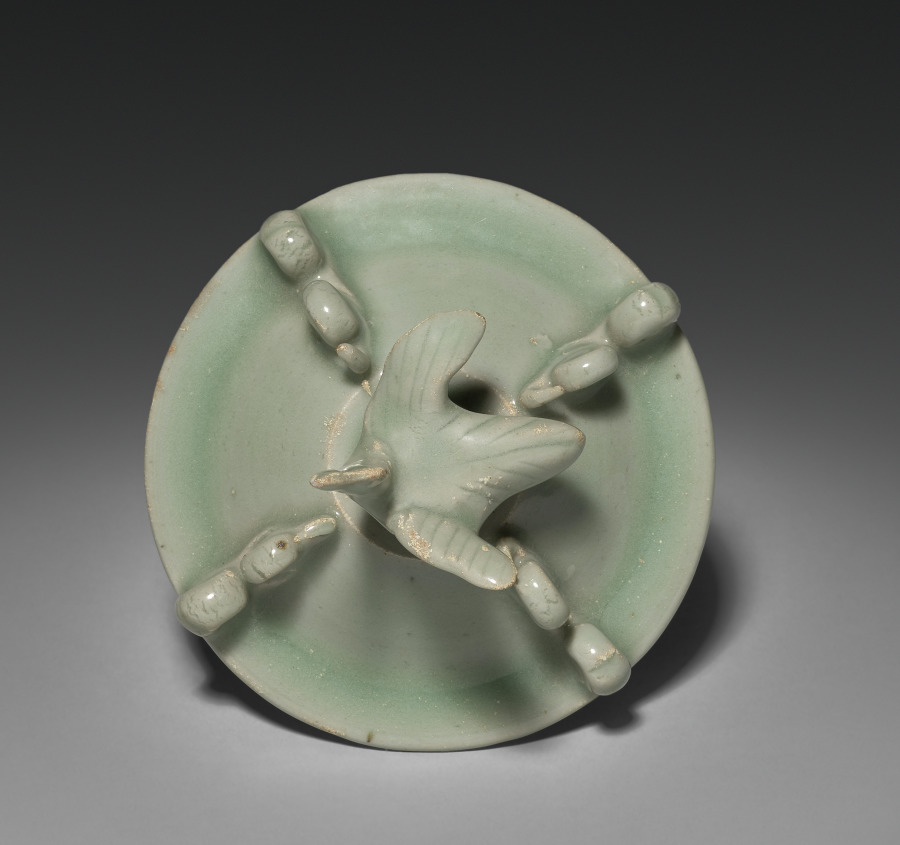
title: Five-Spouted Vase with Cover (cover)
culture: China, Zhejiang province, Longquan region, Northern Song dynasty (960-1127)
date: 1000s-1100s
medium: green-glazed porcelaneous stoneware, Longquan ware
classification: Ceramic